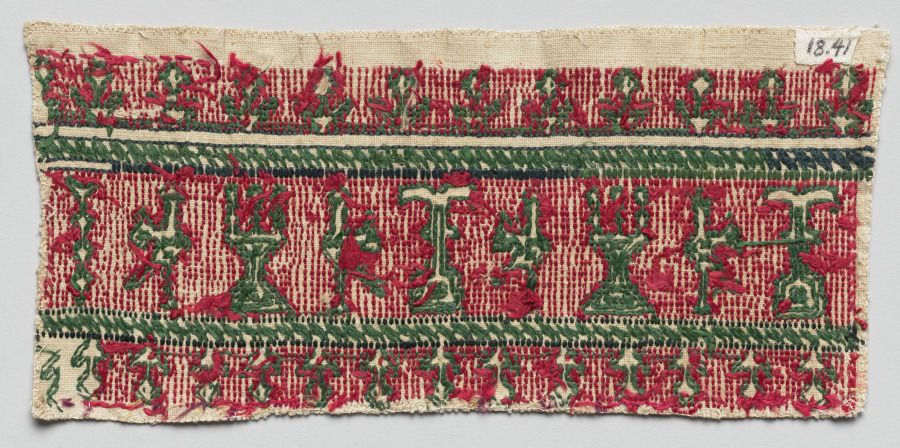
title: Fragment of a furnishing textile (one of five)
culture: Africa, North Africa, Morocco, Azemmour, Moroccan embroiderer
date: 1700s–1800s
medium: Linen, silk, dye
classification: Embroidery